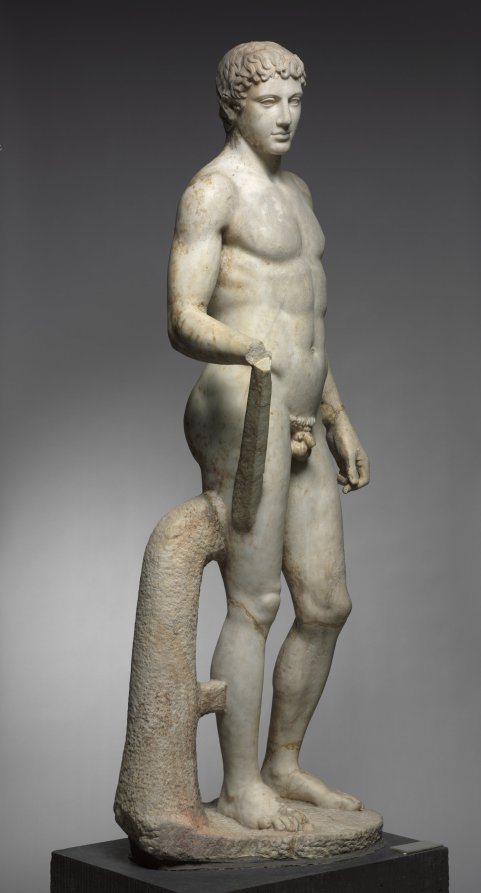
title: Statue of an Athlete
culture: Italy, Roman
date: 1–100 CE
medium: marble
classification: Sculpture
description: This idealized athlete recalls Greek sculptural types invented and popularized during the 400s BC. Large-scale athletes and other sculptures like this were originally created by famous artists as sanctuary dedications. Centuries later, they were widely copied and adapted by Roman sculptors, whose clients sought their own versions of earlier masterpieces. Working in marble rather than bronze, these sculptors added certain elements for stability, such as the struts and the large tree trunk beside the right leg here. Sculptures like this one are profoundly complex, made by and for Romans but descended from Greek ancestors.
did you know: For many years, this sculpture stood in the rotunda of the Cleveland Museum of Art.